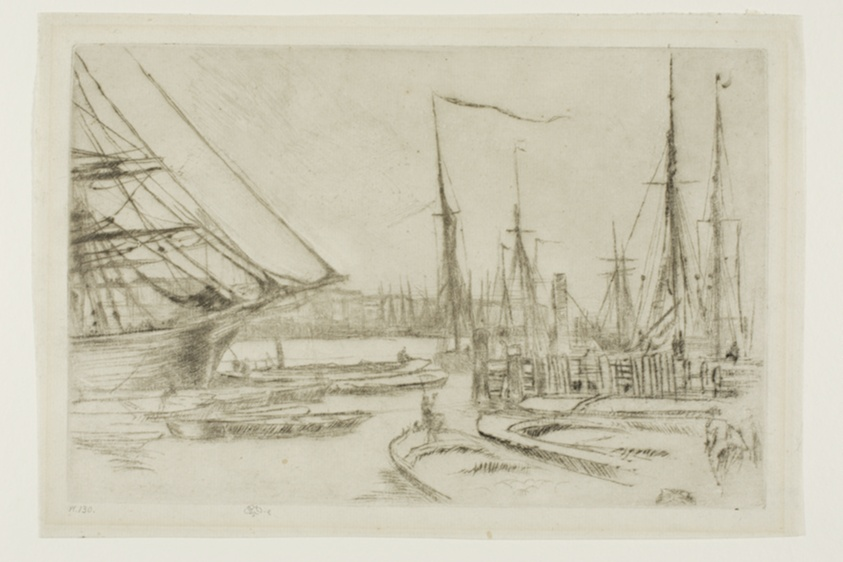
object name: Print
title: From Billingsgate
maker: James McNeill Whistler (American, 1834-1903)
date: 1876/77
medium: Drypoint in black ink on cream laid paper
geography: United States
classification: drypoint; print; prints and drawing; paper